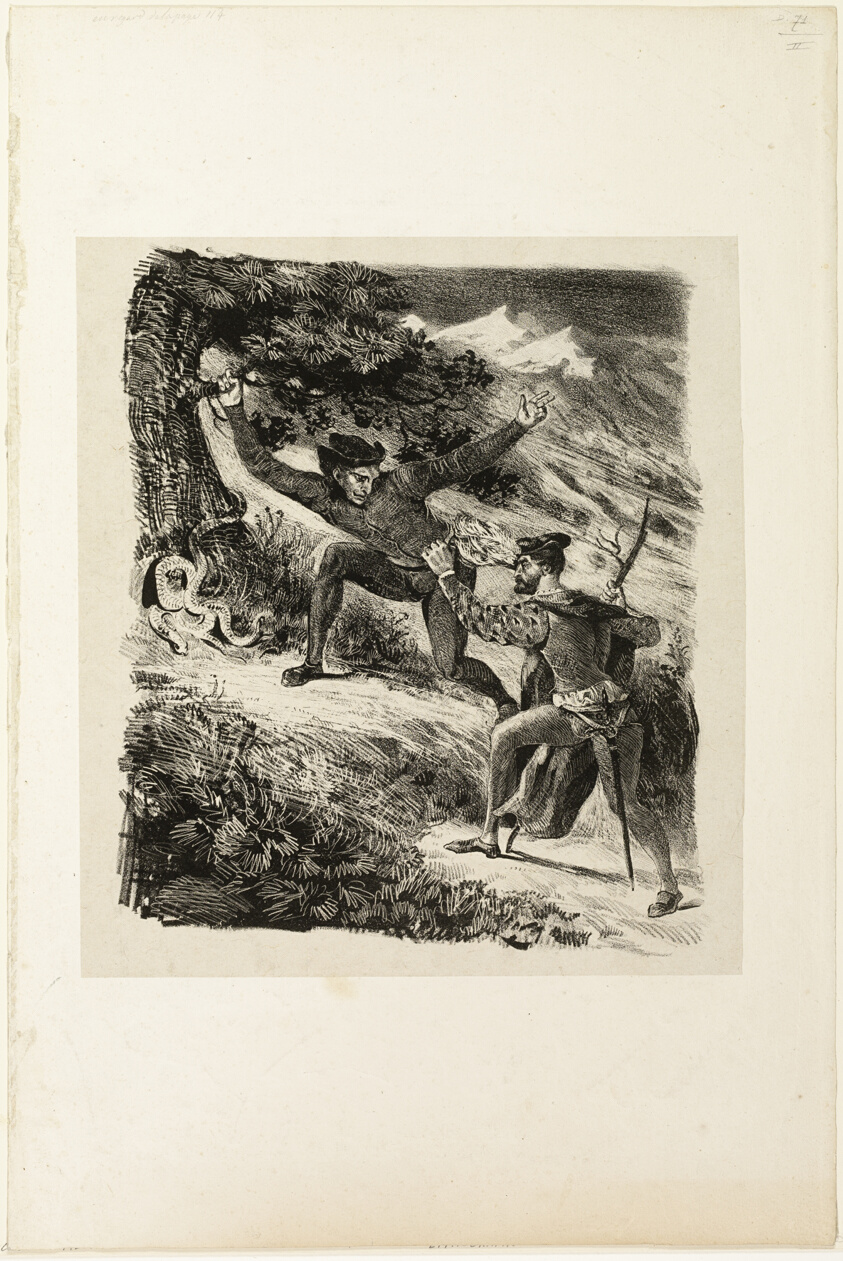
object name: Print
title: Faust and Mephistopheles in the Harz Mountains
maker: Eugène Delacroix (French, 1798-1863)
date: 1828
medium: Lithograph in black on light gray China paper laid down on ivory wove paper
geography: France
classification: lithograph; print; prints and drawing